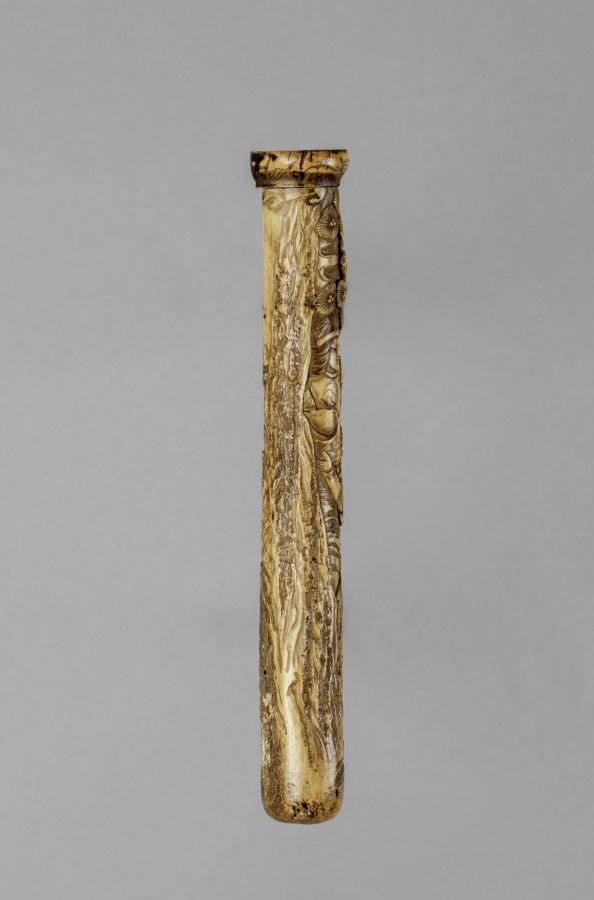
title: Case for a Knife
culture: Japan, Edo period (1615–1868)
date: late 1700s- early 1800s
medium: ivory, steel or iron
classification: Arms and Armor